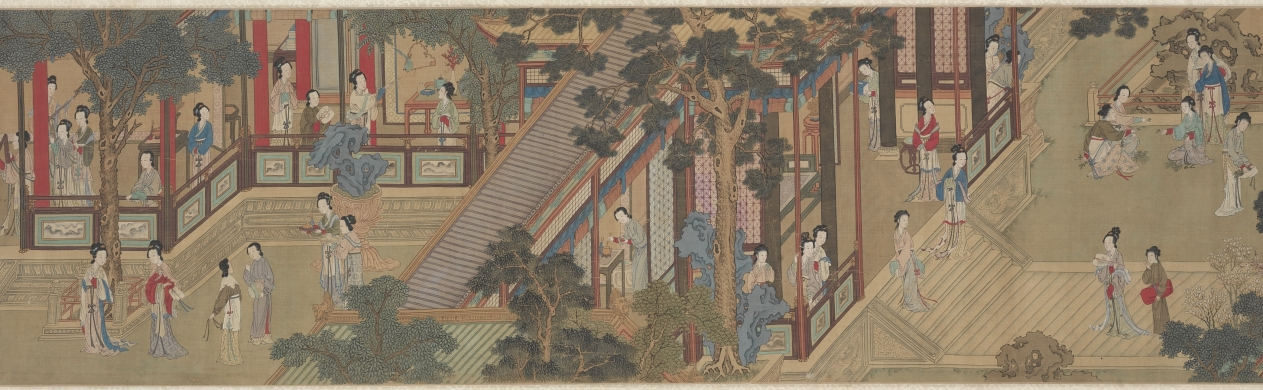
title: Palace Ladies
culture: China, Qing dynasty (1644-1911)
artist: copy after Qiu Ying (Chinese, 1494–1552)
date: 1644–1911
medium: handscroll, ink and color on silk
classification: Painting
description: This handscroll illustrates the pursuits of court ladies in a palace precinct on a spring day. Women, young girls, and their maids amuse themselves by sitting on a swing, playing games, watering and admiring peonies, performing music together, playing the qin (zither), feeding a parrot on the balustrade and fish in the water, or catching butterflies. The life of elite women was mostly restricted to the so-called inner quarters, meaning the garden and inner courts of the house. This painting idealizes the world of young palace girls that in fact was often filled with boredom and waiting for a lover.